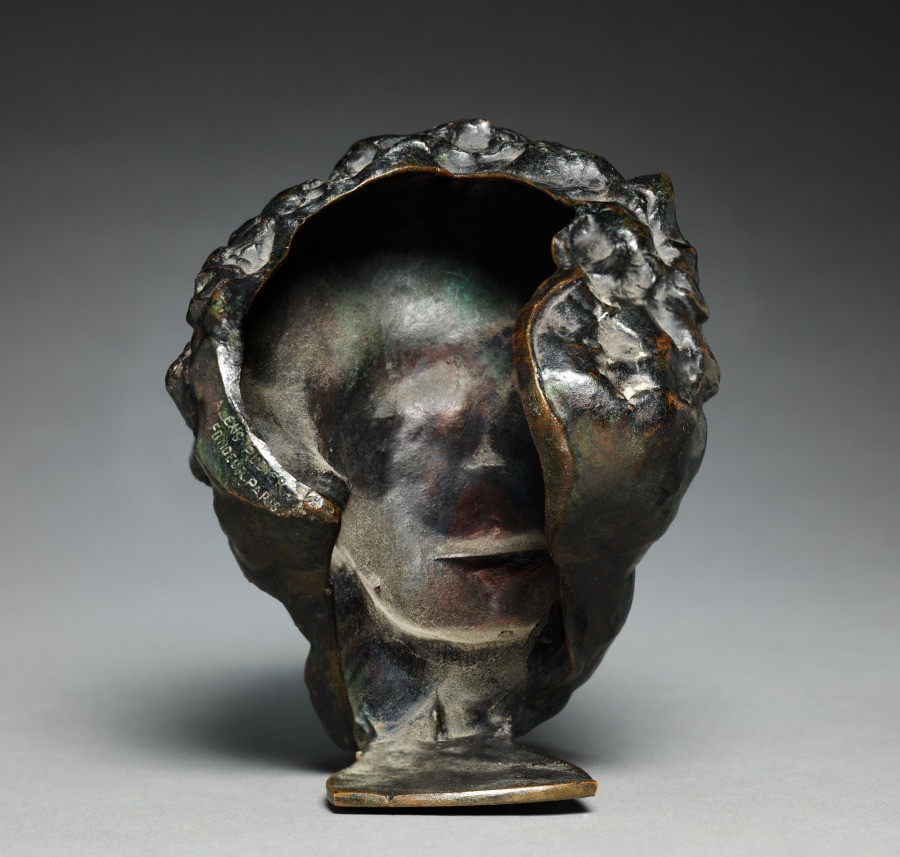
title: Mask of Séverine (Caroline Rémy)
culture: France, 19th century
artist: Auguste Rodin (French, 1840–1917)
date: 1893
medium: bronze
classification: Sculpture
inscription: Signed sinister side of neck: "A. Rodin"; inside dexter side in relief: "A. Rodin"